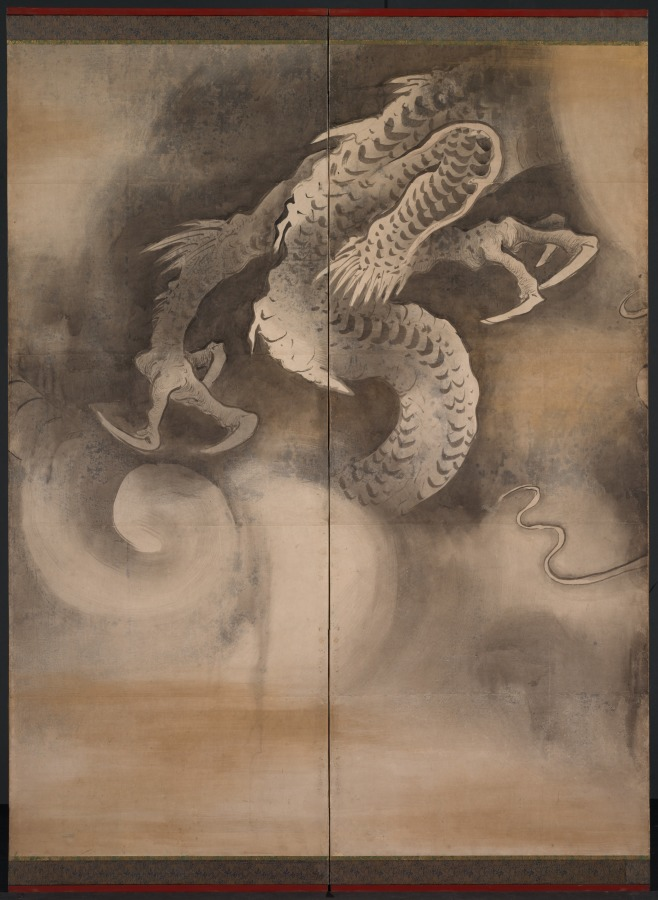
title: Dragon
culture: Japan, Edo period (1615–1868)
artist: attributed to Soga Nichokuan (Japanese)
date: early to mid-1600s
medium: six-panel folding screen; ink, slight color, gold, and silver on paper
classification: Painting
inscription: Signed: Soga Chokuan II (Soga Chokuan ni). Sealed: Hoin (right), Soga Chokuan Hoin (three seals at left) Edo period (1615-1868)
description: A dragon dives through clouds on this screen, while on the other screen, a tiger looks upon a waterfall as it prowls out of a bamboo grove. Tiger and dragon are traditional symbols of the balancing forces in the world, yin (the feminine aspect) and yang (the masculine aspect). This painting has a signature and seals, identifying it as a work by Soga Nichokuan, a painter thought to be from Sakai (near Osaka), and known primarily for his representations of hawk-eagles (kumataka).